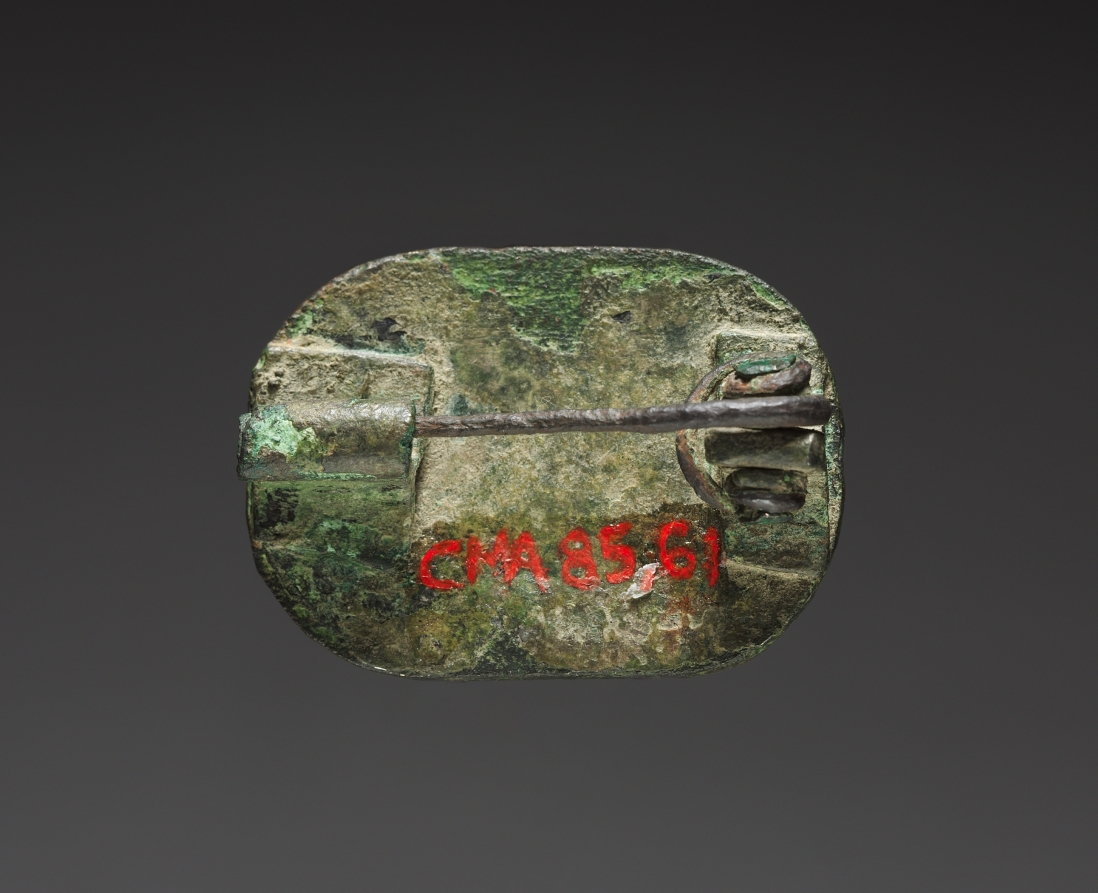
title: Votive or Civic Badge with a Crowned Figure Kneeling before Christ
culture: Italy, Venice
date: c. 1300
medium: gold repoussé medallion under glass inset within a bronze clasp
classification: Metalwork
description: This brooch was probably made to fasten a ceremonial cloak, and may have been intended as a diplomatic gift or memento. The central composition parallels the main face of the famous gold coin, a ducat, of the Venetian Doge Giovanni Dandolo minted in 1288-1289. Unlike the coin, the medallion is neither struck or diecast; it is tooled and chased, making it one of a kind.